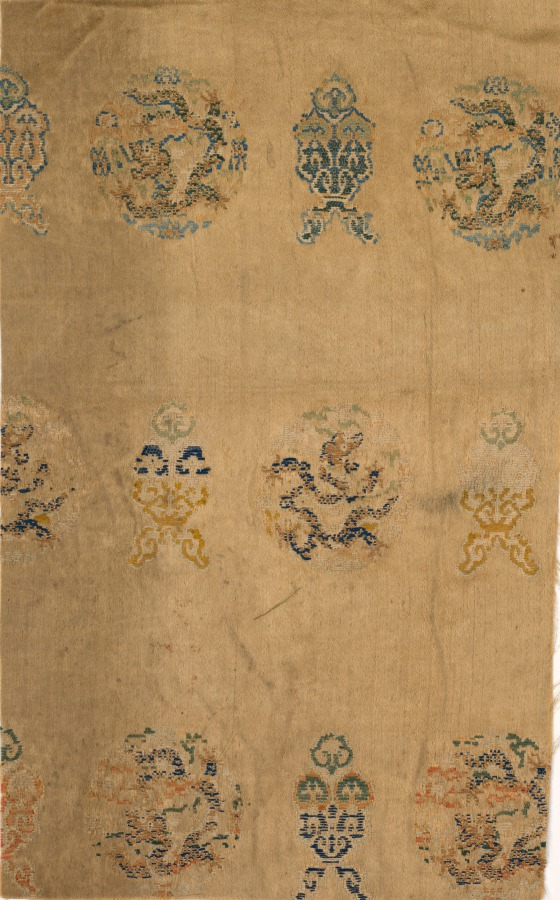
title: Fragment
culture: China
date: 1700s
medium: brocaded satin, silk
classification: Textile